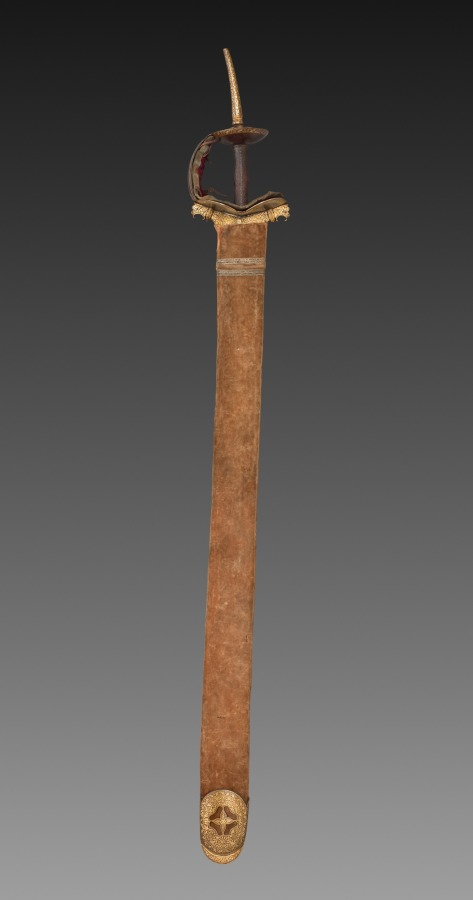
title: Sword with scabbard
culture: India, perhaps Deccan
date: 1700s–1800s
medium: Watered steel blade with iron hilt inlaid with gold; velvet lining with leather straps; wooden scabbard with velvet case and metallic threads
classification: Arms and Armor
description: Straight swords were typical of those used among military and aristocratic circles in the southern regions of the Deccan, in contrast to the curved swords favored by Central Asian equestrians. Increased contact between the Mughal north and the Deccan south during the 1600s led to the appearance of the Deccan-style sword in courtly portraits made during the time of Jahangir and Shah Jahan, and later.